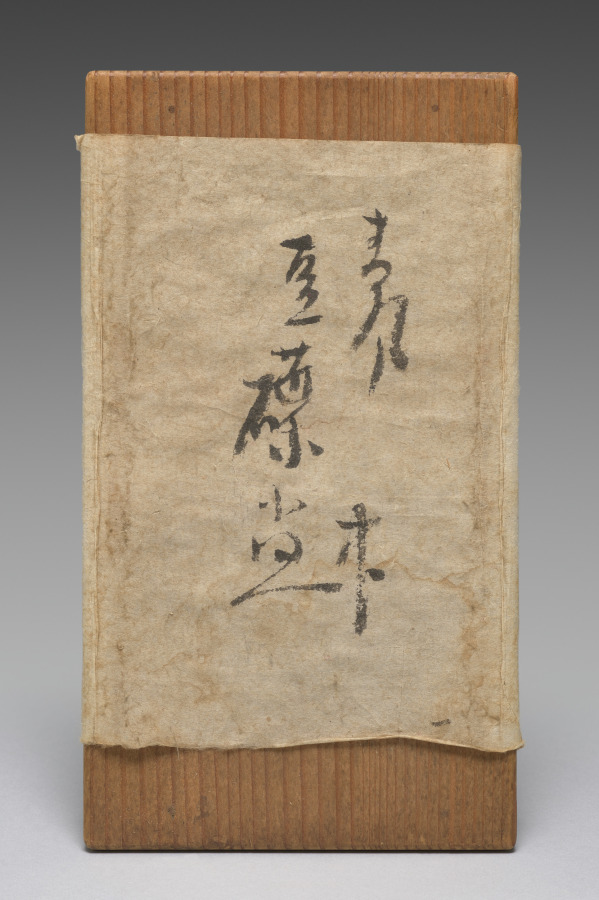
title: Saucers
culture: Japan, Meiji period (1868–1912)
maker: Seifū Yohei III (Japanese, 1851–1914)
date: 1893–1914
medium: Set of ten saucers; porcelain with green glaze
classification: Ceramic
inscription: 清風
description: Yohei III’s main output for his sophisticated clientele was in the form of tea sets and dining sets. He created a range of dishes in green glazes. He often produced in pairs, sets of five, or sets of ten. For this set of ten small dishes in a simple, round form that emphasizes the glaze above all, the box lid designates the piece as seiji, or green-glazed porcelain, using a general term for the extensive palette of green glazes often called celadon in English. The box lid further identifies the dishes themselves as tōchō, literally “bean-sized saucers,” a size that makes them suitable for dipping sauces.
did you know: The ten dishes in this set are stored in stacks of five in a two-compartment box.